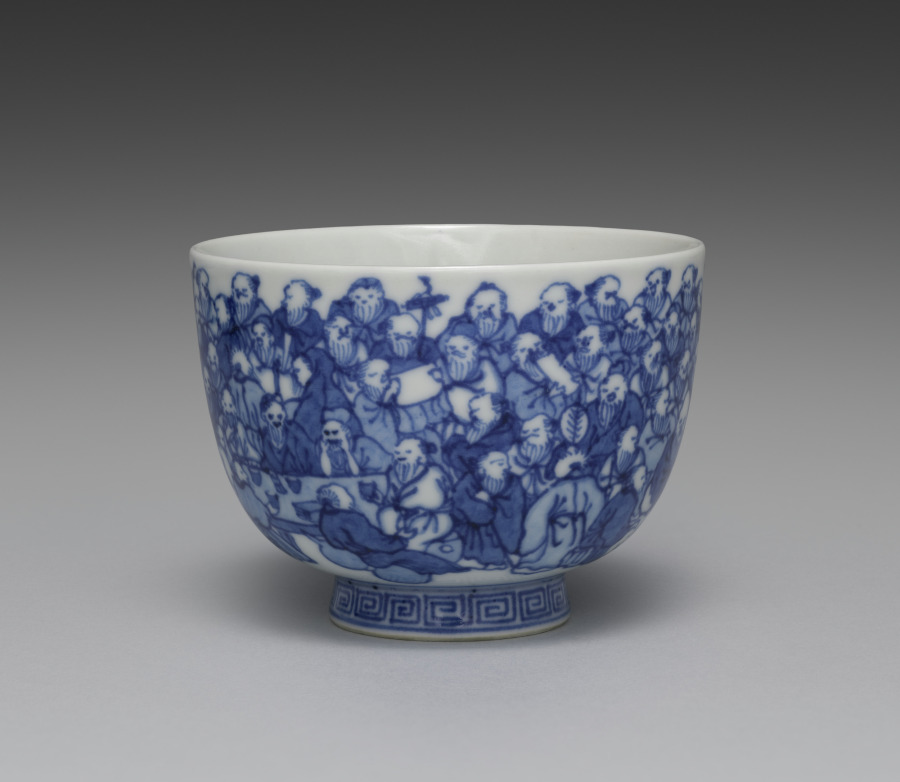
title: Teacup from Teacups with a Hundred Sages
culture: Japan, Meiji period (1868–1912)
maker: Seifū Yohei III (Japanese, 1851–1914)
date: 1893–1914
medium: One from a set of five teacups; porcelain with underglaze blue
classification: Ceramic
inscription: 清風造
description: Each of these five teacups has a painting of identical design in underglaze blue, but as the tiny figures are drawn entirely by hand, each cup has its own personality. The theme of the sencha cups is an assembly of sages or immortals, literally “a hundred venerable [people]” (hyakurō). The myriad figures crowd the scene in groups. The god of longevity, with his tall forehead, sits with his cranes, having flown in from Mt. Penglai on the Isle of the Immortals. Seven long-bearded sages sit around a stone table, chatting and drinking; one is seated on an enormous gourd. Of course, there is a stack of books on the table, and elsewhere, scrolls are being written upon or read—in one case held very close by a sage who is wearing glasses. The design was enormously popular in ceramics made for those engaged in literati culture.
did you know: Seifū Yohei III (1851–1914) produced many works for tea gatherings where people drank Chinese-style leaf-tea (sencha).